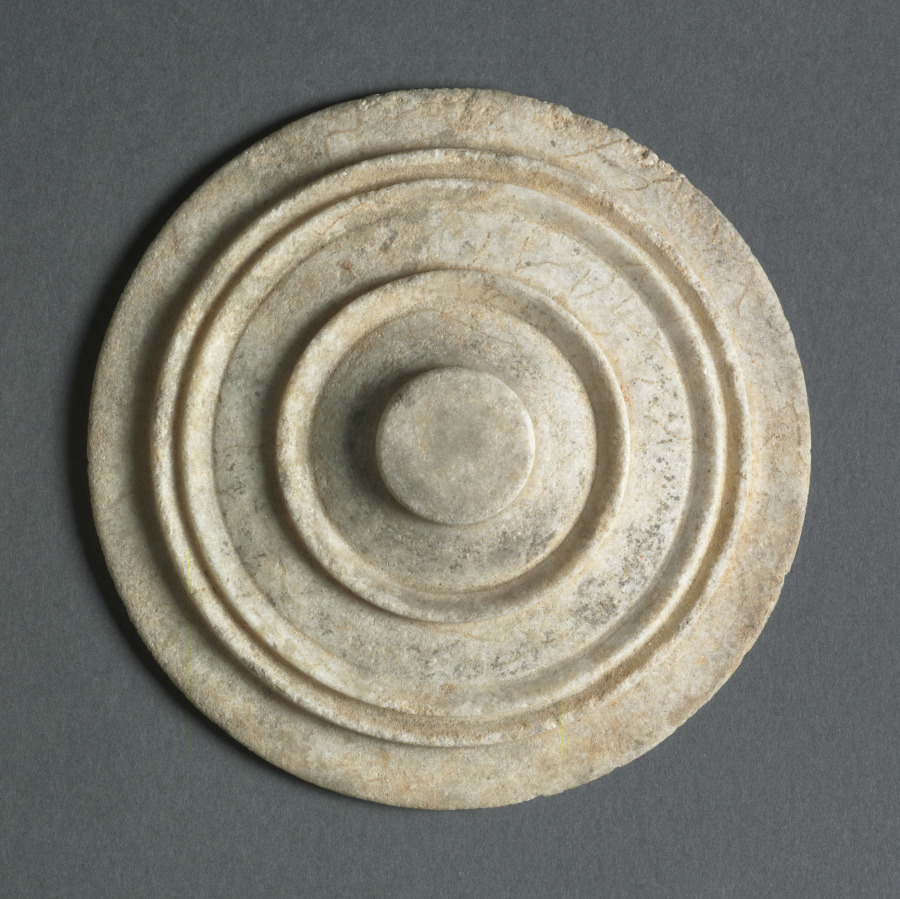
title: Pyxis (lid)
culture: Greece, Attic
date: 400–300 BCE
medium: marble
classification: Stone